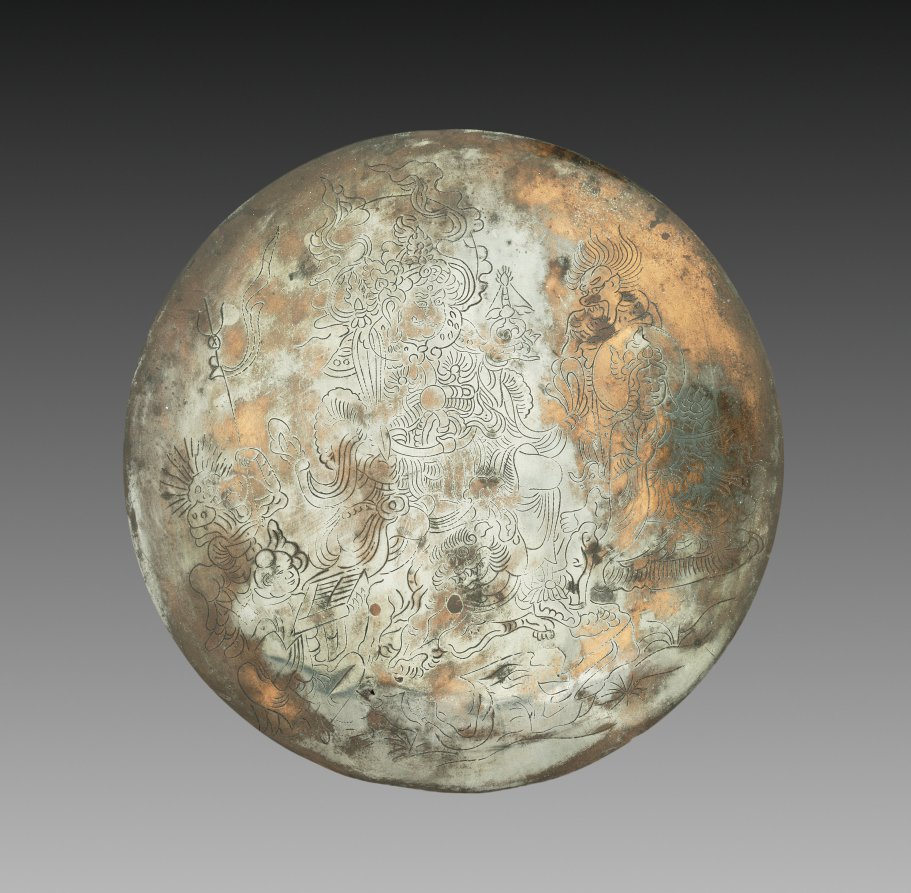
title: Bishamonten Ritual Mirror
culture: Japan, Heian period (794–1185)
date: 1000s–1100s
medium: silvered bronze with incised design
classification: Metalwork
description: Bishamonten, the Buddhist guardian of the North, appears here with an entourage. Early votive mirrors like this one are called kyōzō, literally “mirrors with images.” One theory is that they appeared along with the development of Shinto-Buddhist combinatory thought, in which specific Buddhist deities were identified with specific kami, or Shinto deities. In this theory, sacred mirrors venerated as proxies for kami came to be incised with images of Buddhist deities. Another idea is that they developed in the context of Esoteric Buddhist ritual.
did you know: Bishamonten sits on a demon who struggles beneath his weight.